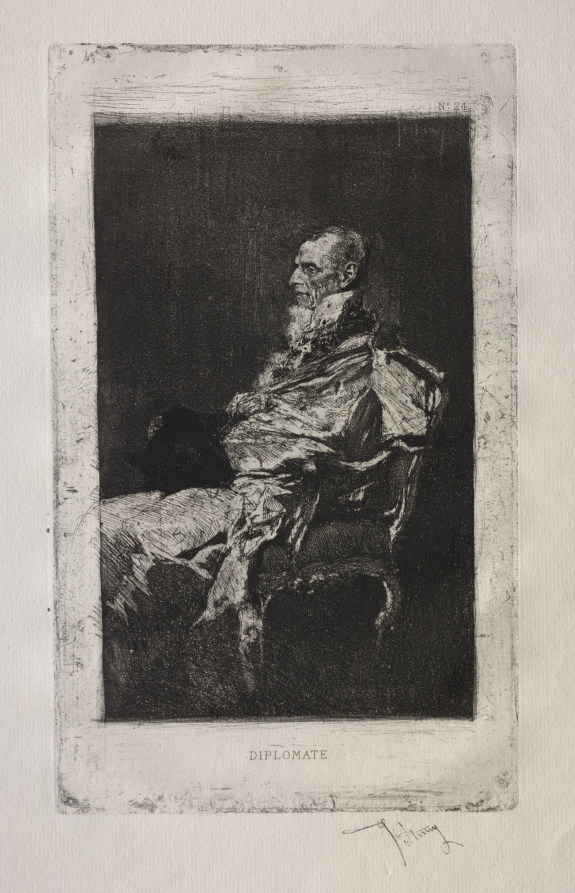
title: Diplomat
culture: Spain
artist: Mariano Fortuny (Spanish, 1838–1874)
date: 1868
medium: etching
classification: Print